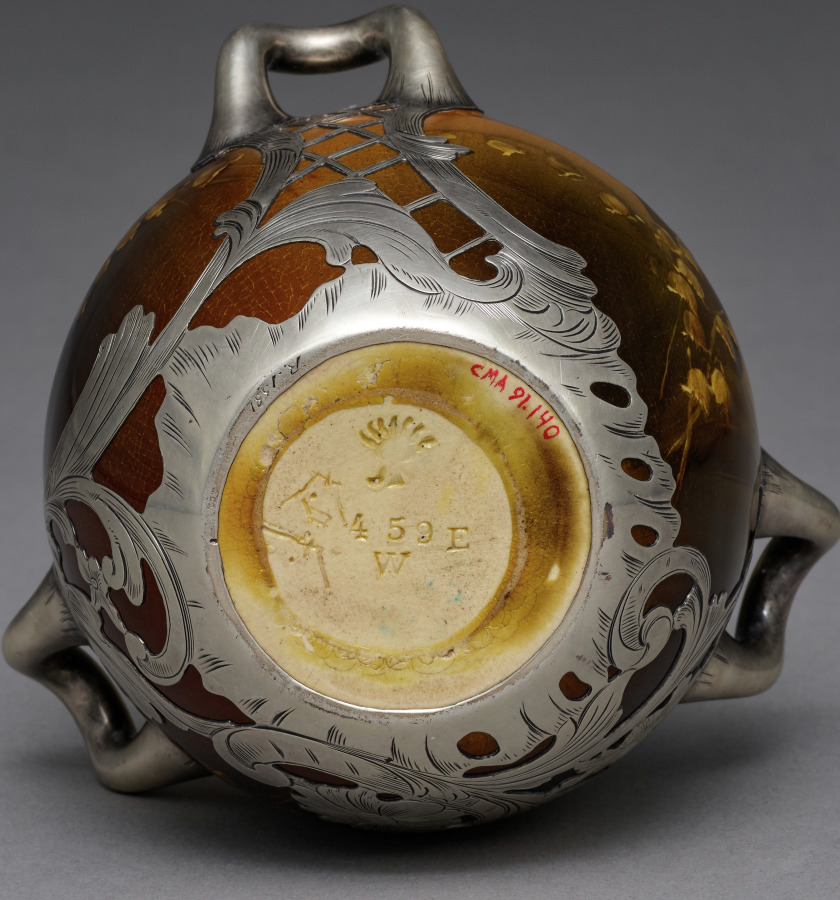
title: Vase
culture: America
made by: Rookwood Pottery Company (American, established 1880)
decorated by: Emma D. Foertmeyer (American)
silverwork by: Gorham Manufacturing Company (America, est. 1831)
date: 1893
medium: earthenware with silver overlay and three silver handles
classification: Ceramic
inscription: Stamped on rim of base: "Gorham MKG. CO."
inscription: Engraved on rime of base: "R. 1531".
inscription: Scratched underside: unidentified lines and sun type image.